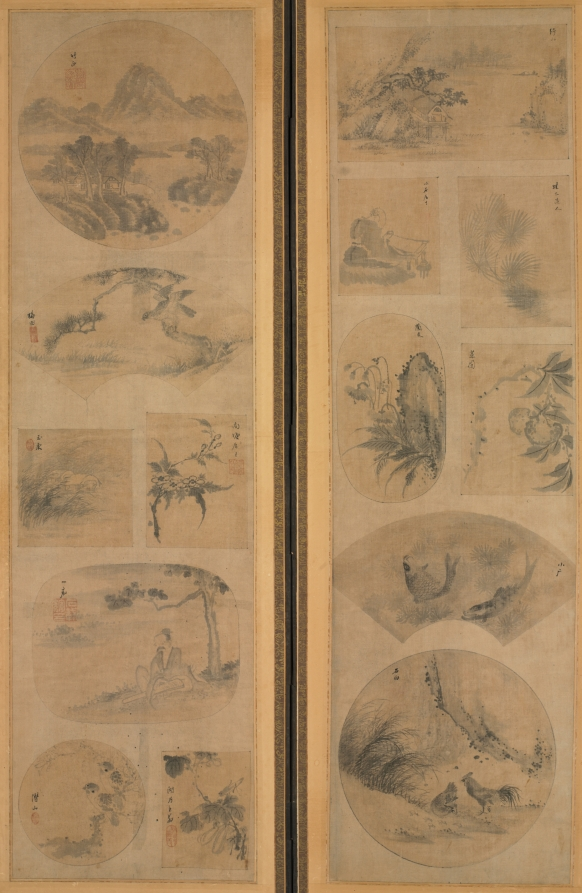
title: Painting of One Hundred Themes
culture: Korea, Joseon dynasty (1392–1910)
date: late 1800s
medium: Ten-panel folding screen affixed with album leaves (obverse), calligraphy (reverse), ink and color on silk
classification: Painting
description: The front of this screen features an assortment of subjects: birds and flowers, landscapes, and scenes of everyday life, mostly in monochromatic ink with light colors. The screen’s reverse side conveys a number of classical poems about the fleeting beauty of the four seasons. Traditionally, only one side of a folding screen bears painted or embroidered images, since these were used as a background furnishing. In Korean houses by the 1800s and early 1900s, however, two-sided folding screens became noticeably popular, possibly inspired by Japanese double-sided folding screens, which mainly served as room dividers in Japanese households.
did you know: The way of displaying small images of various subjects became one of the most popular type of painting toward the end of the 19th century.